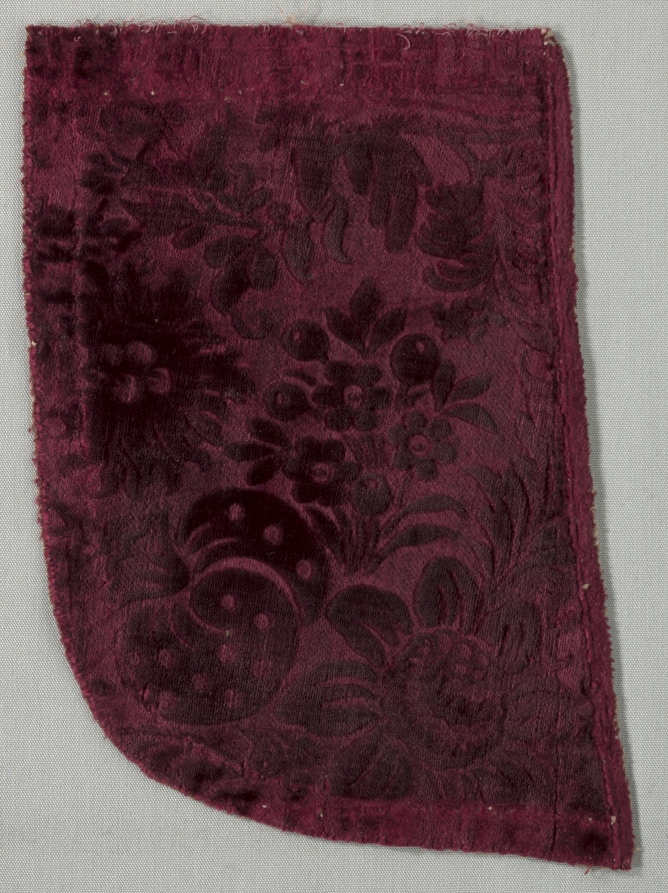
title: Fragments of a Chasuble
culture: Italy, 17th century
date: 1600s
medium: velvet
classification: Velvet